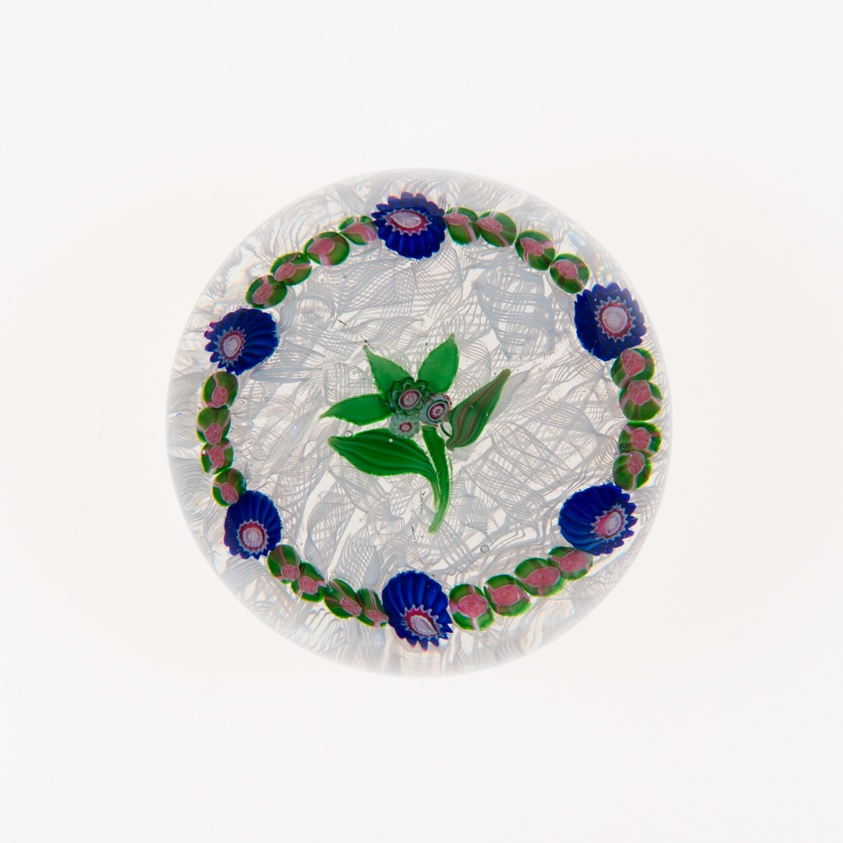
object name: Glass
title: Paperweight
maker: Clichy Glassworks (Cristalleries de Clichy); Clichy, France, 1837-1885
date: 19th century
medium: Glass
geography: Clichy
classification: paperweight; glass